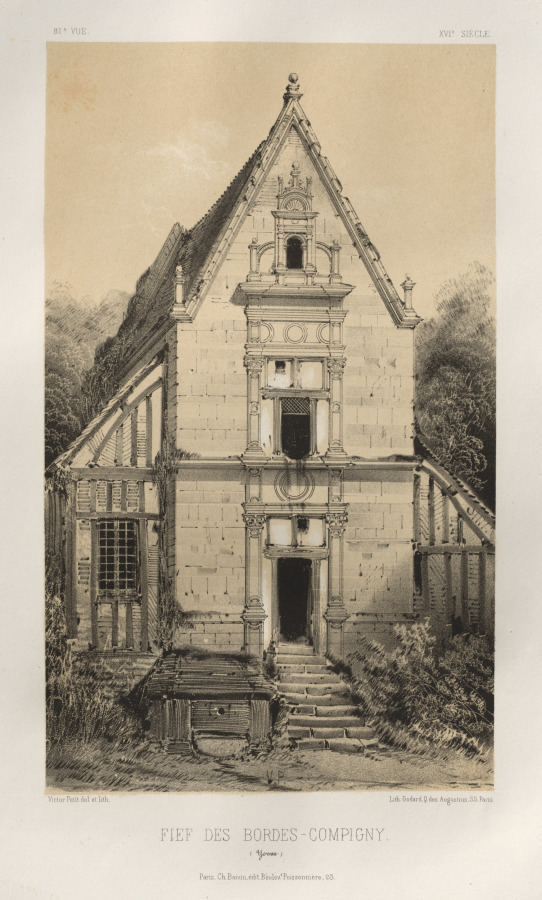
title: Architecture Pittoresque ou Monuments des XVeme. Et XVIeme. Siecles: Chateaux de France des XV et XVI Siecles: Pl. 81, FIEf Des Bordes-Compigny (Yonne)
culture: France, 19th century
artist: Victor Petit (French, 1817–1874)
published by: Charles Boivin (publisher and editor); Lith de Godard a Paris (printer)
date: 1860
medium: lithograph with tint stone, from portfolio of 100 lithographs with tint stone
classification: Print